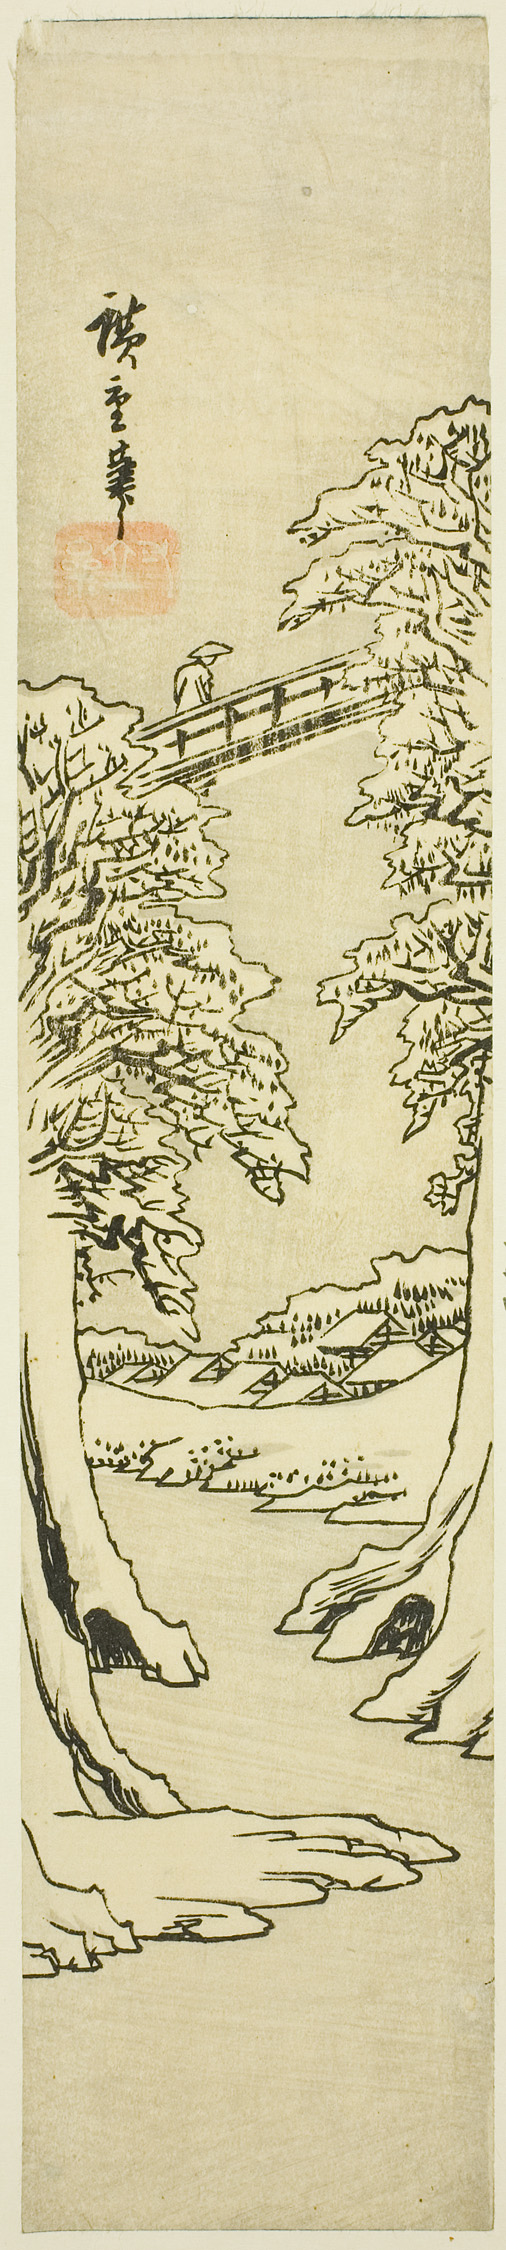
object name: Print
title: The Monkey Bridge in Winter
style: Japanese (culture or style)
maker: Utagawa Hiroshige 歌川 広重; Japanese, 1797-1858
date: Mid-19th century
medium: Woodblock print; hashira-e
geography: Japan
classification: woodblock print; print; asian art; woodblock